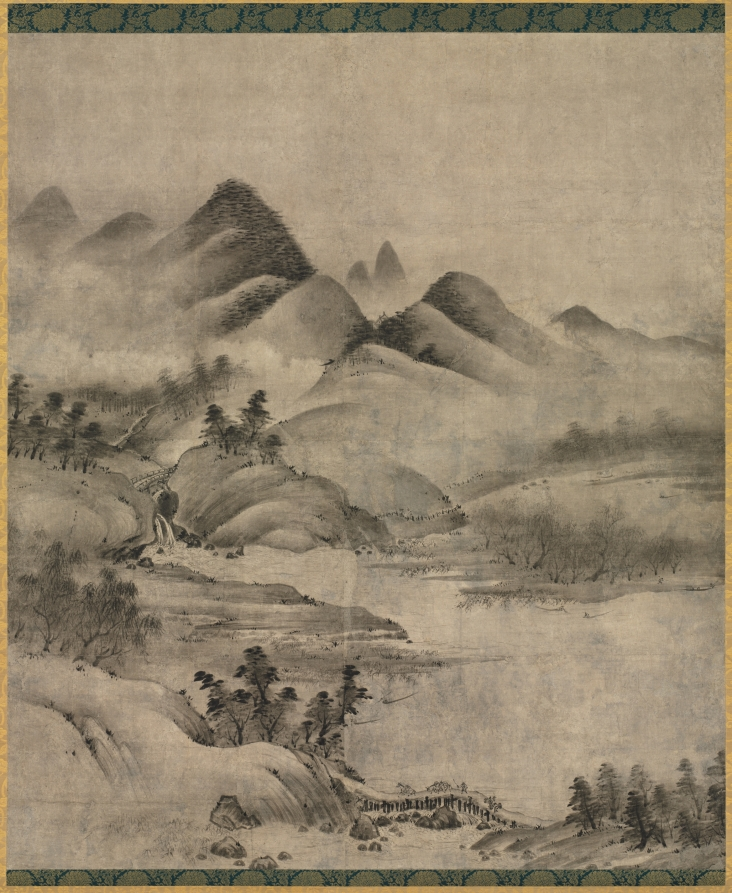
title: Landscape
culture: Japan, Muromachi period (1392–1573)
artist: Sōami (Japanese, d. 1525)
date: early 1500s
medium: hanging scroll; ink on paper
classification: Painting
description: Kyoto-based painter Sōami adapted the small-format Chinese album leaf and handscroll painting compositions belonging to the Ashikaga shogunate to the large-scale paintings he created for residences and Buddhist temples. As curator of the shogunal collection, Sōami would have carefully examined its Southern Song and Yuan dynasty Chinese paintings, gaining specialized knowledge of a variety of brush modes, including the soft style used for this painting. The scene is part of a continuous landscape once mounted in the folding screen format. Removed from the screen, this section of the painting was cut down, given new backing papers and a textile mounting with a hanging cord at the top and a roller with knobs at the bottom so that it could continue to be appreciated.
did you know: Another part of this composition survives in Kyushu, Japan.